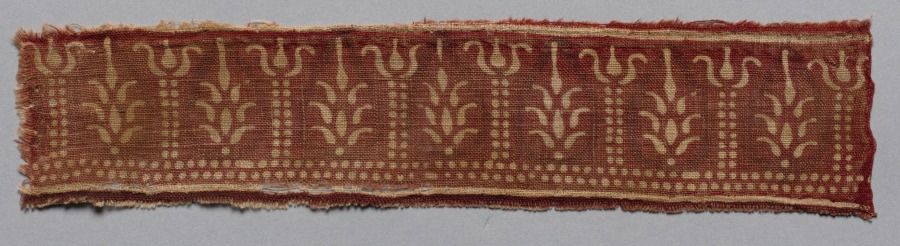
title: Fragment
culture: India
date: 1100s–1300s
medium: Cotton: plain cloth, resist dyed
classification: Textile